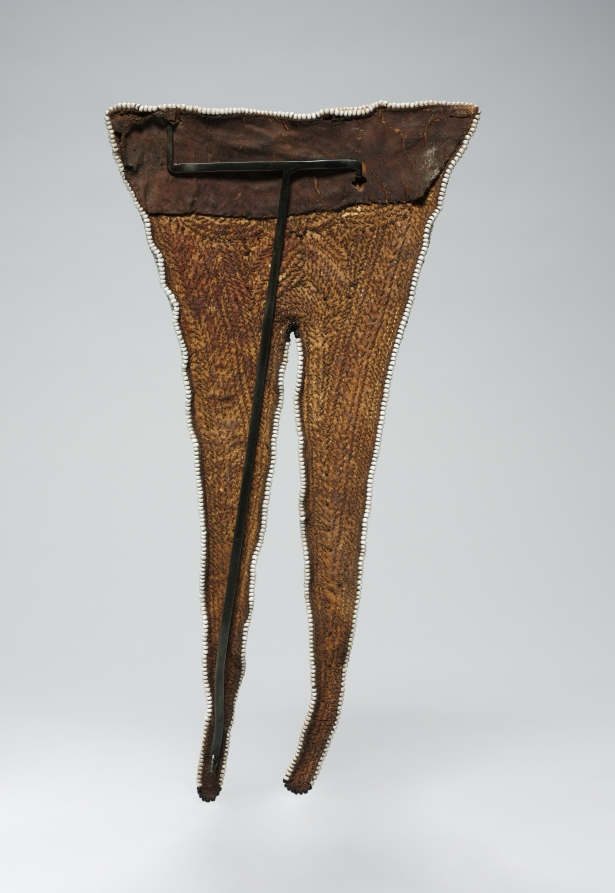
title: Under apron (iinkciya)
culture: Africa, Southern Africa, South Africa, Xhosa-style (South Nguni) maker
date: 1800s–1900s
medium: Leather, glass beads, and sinew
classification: Garment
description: This is an exquisite example of a rare type of swallowtail-shaped apron worn by young female initiates until the mid-19th century. On the upper portion, the black beads were applied in such a way that they can be read as a human face or even as a full figure. In fact, the overall form of the apron can be viewed as representing the lower torso and legs of a woman with a neatly marked pubic region.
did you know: Women made beaded "aprons" like this to wear under their clothes on festive occasions in the nineteenth century; expensive imported beads were a sign of wealth and status.